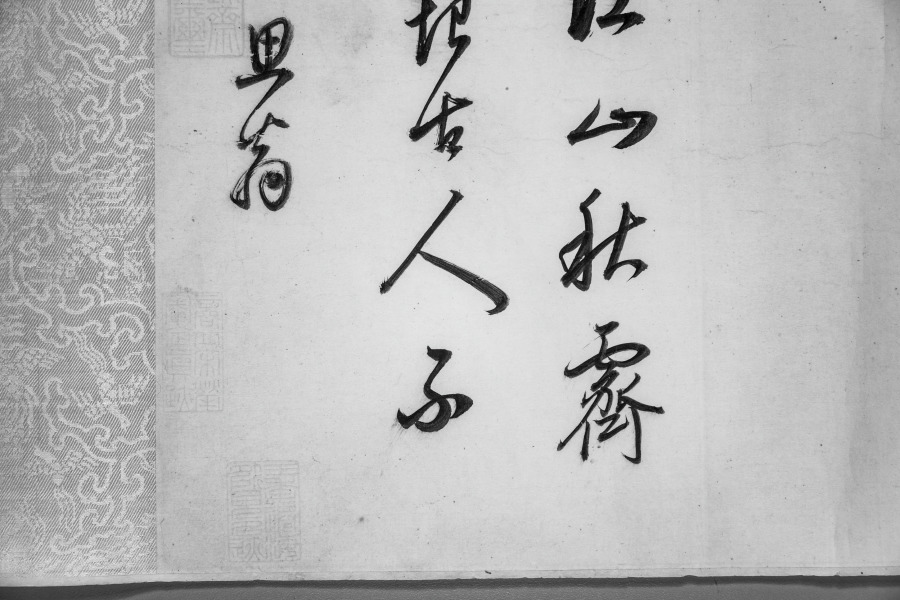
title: River and Mountains on a Clear Autumn Day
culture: China, Ming dynasty (1368–1644)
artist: Dong Qichang (Chinese, 1555–1636)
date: c. 1624–27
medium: Handscroll; ink on Korean paper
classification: Painting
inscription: 黃子久江山秋霽似此，當恨古人不見我也。思翁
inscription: 董文敏每遇高麗鏡面箋，書畫尤為入神。此卷改表紙用之，字跡隱然，兼有朝鮮之印。至於筆法圓秀，真接倪黃。豈文沈所可同日而語也。 康熙庚午中秋後一日，天氣澄爽，重裝初畢，跋於瓶廬。抱瓮翁高士奇。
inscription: Second inscription by Gao Shiqi 高士奇 (1645–1704): On the twenty-third day of the ninth month, the jiaxu year of the Kangxi era [1694], I packed my bags to head north. When my boat passed Wuchang [Suzhou], Mr. Mantang [Song Luo] brought wine to bid me farewell so that we could share our thoughts on our separation in the last few years. I showed him the paintings and calligraphy which I collected and asked his opinions. Since Mr. Mantang does not own any handscrolls by Wenmin [Dong Qichang], I leave this one for him in commemoration of our parting; thus the painting will have a worthy owner and our meeting will become a beautiful story in the future. It is the fourth day after the beginning of winter, with the sky clear and sober. Trees under frost have turned red and yellow, seemingly echoing the brush and ink in the painting. I also ask Mr. Mantang to inscribe a poem to commemorate our meeting so that it will survive forever.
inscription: 1 colophon and 4 seals of Song Luo 宋犖 (1634–1713): Who is the foremost art connoisseur of our dynasty?/ Tangcun [Liang Qingbiao, 1620–1691] is dead, so the title passes to Jiangcun [Gao Shiqi]./ Leaving office, you retired for five years in the Lake region./ Fondling handscrolls and hanging scrolls from morning to evening./ You sent me your collection catalogue Xiao Xia Lu last year;/ It is indeed the true equal of [Zhou Mi's] Yun Yan Guo Yan./ This year you returned to the capital by imperial order;/ Your boat with calligraphy and paintings anchored at the river bank in Suzhou./ When we met each other you did not waste any time for conversation by poured out immediately/ From your "coral net" extraordinary treasures./ You produced incomparable scrolls, with gold-inscribed labels and jade rollers,/ Pouring out from bags and trunks, they were spread in disarray./ Without a word, I rolled and unrolled until my fingers were numbed,/ We sat straight, facing each other quietly, and never felt tired./ For three days we forgot about sleeping and food./ And at times we shouted our joy out loud, forgetting who is host or guest./ Your Dwelling in the Fuchun Mountains and the Yuansheng manuscript/ These peerless works I myself examined with delight./ As an added pleasure to the farewell dinner under the Maple Bridge,/ You allowed me to hold again this handscroll by Dong Qichang--/ The Misty River and Piled Peaks [by Zhao Mengfu] and this Clear Autumn Day are two extraordinary masterpieces./ In showing such life and spirit with "qi yun." the artists were truly "men of heaven."/ The Clear Autumn Day is not even three feet long,/ Painted on tributary Korean paper, it shines like silver./ Every building up and every turn of the mountains imitates nature,/ Every tree and every rock is removed from the commonplace./ From the beginning, the theory of poetry is the theory of painting,/ Like the lotus and the morning sunshine, they complement and refresh each other./ The artist's inscription regrets that "the Old Masters cannot see my scroll."/ Huang Gongwang would have agreed in his grave./ The vermilion of the seals glitter and dazzles the eyes,/ These added accessories are as valuable as jade./ You are very kind to give it to me,/ The feelings expressed in your inscription are so sincere./ Wanting to refuse, but unable, I accept it to respect your wish,/ And taking off my gown and cap I wrapped it with care./ You asked me to write a long poem in commemoration of this beautiful occasion,/ I am too ashamed that my effort in response is so poor and inadequate./ Returning home, I unrolled it under candlelight, trying to write the colophon,/ The light of the waning moon shines at the foot of the mossy wall./ Earnestly humming and brows knit in deep thought, I try to compose;/ The verses are not outstanding, but the facts are real./ With this poem recorded at the end of the scroll, I mail it to you for approval,/ This poem and this painting shall outlast a thousand springs. (Translation by LYSL/HK/WKH)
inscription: 1 colophon and 2 seals of Shao Changheng 邵長蘅 (1637–1704); 2 inscriptions and 14 seals of the Qianlong 乾隆 emperor (r. 1736–95); 1 seal of the Jiaqing 嘉慶 emperor (r. 1796–1820); 3 seals of the Xuantong 宣統 emperor (r. 1908–11); 1 seal unidentified.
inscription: [印] 朝鮮國王之印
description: Dong Qichang had a tremendous impact on the artistic practices and historiography of later generations; his works and writings shaped literati aesthetics. Here, Dong places an abstract landscape composition diagonally across the picture plane, configured to recall earlier masters and simultaneously express his own personal style. Dong’s inscription claims, Huang Gongwang’s Autumn Day, looks like this. I truly regret the master has not seen my work. In fact, Dong Qichang may have had Dong Yuan’s Xiao and Xiang Rivers in mind, a work he owned and considered a key work in Chinese art history.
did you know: The painting has an imprint of a Korean seal that reads "Seal of the king of Joseon."